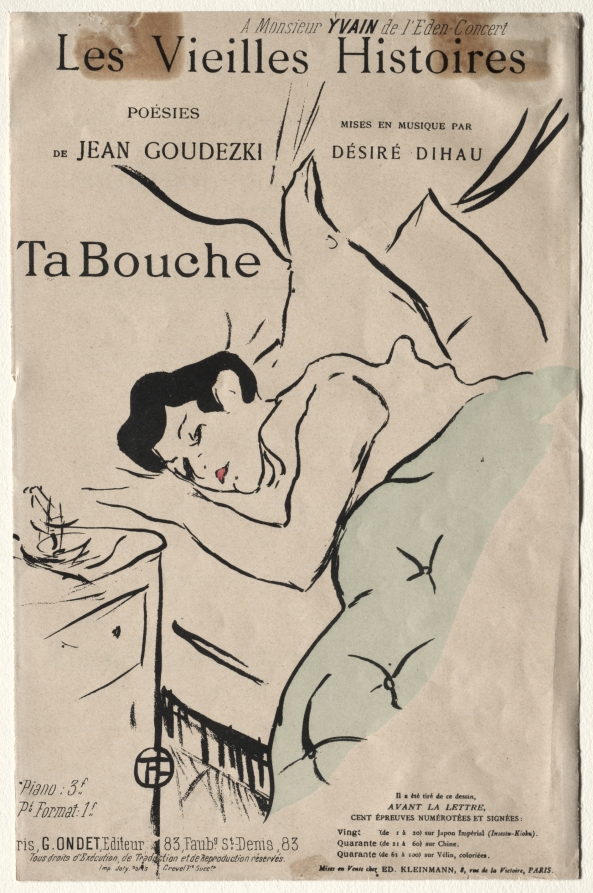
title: Les Vieilles histoires: Ta Bouche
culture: France, 19th century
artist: Henri de Toulouse-Lautrec (French, 1864–1901)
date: 1893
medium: lithograph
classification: Print